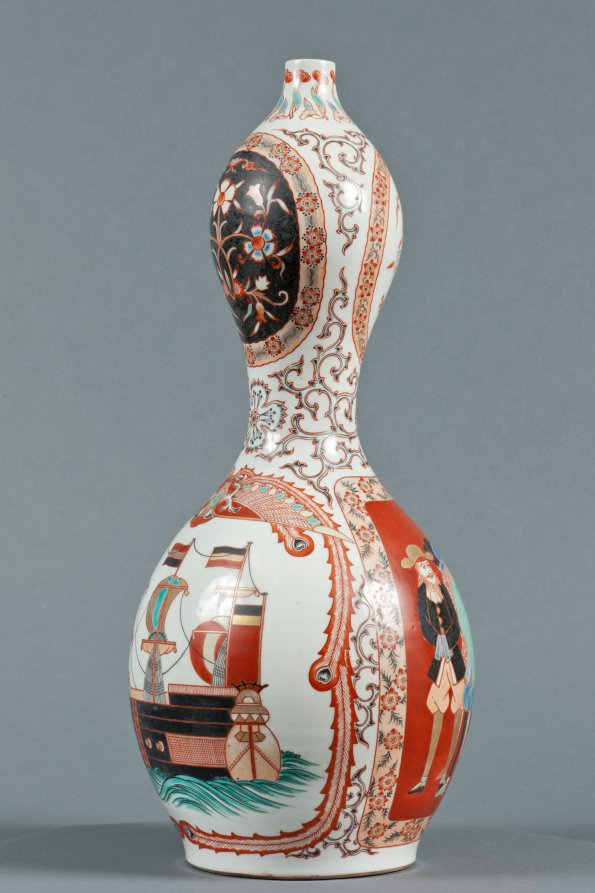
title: Bottle with Western Ships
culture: Japan, Edo period (1615–1868)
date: c. 1800–1868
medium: Porcelain with decoration in colored enamels and underglaze blue, overglaze enamels, and gold (Hizen ware, Arita type)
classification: Ceramic